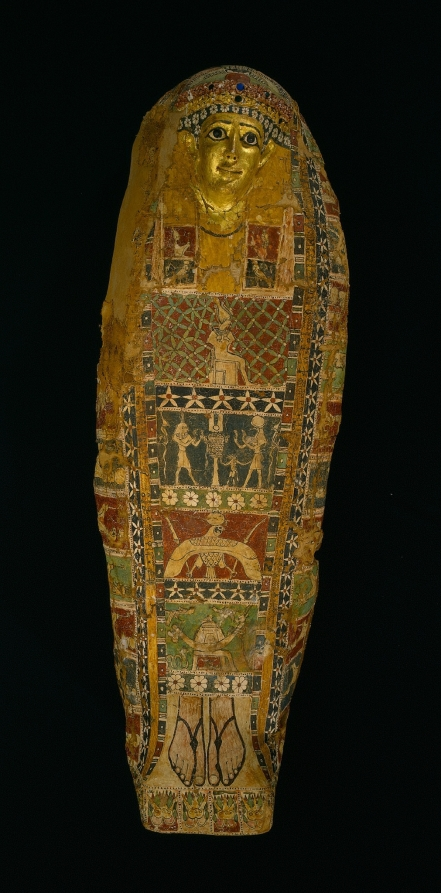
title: Cartonnage Mummy Case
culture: Egypt, Greco-Roman period (332 BCE–395 CE), Ptolemaic dynasty (305–30 BCE)–Roman empire (30 BCE–395 CE)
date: c. 50 BCE–50 CE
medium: cartonnage, painted and gilded, with glass inlays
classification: Funerary Equipment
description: This mummy case is made of cartonnage, a material similar to papier-mâché, but using layers of linen rather than paper. Cartonnage mummy cases such as these are contemporary with funerary portraits painted on wood or linen, although they present a very different appearance. The face, modeled in plaster, is bland and idealized, although the effect of the gilding and glass inlays is quite dazzling. The body is painted with traditional, age-old funerary motifs: the god Osiris, seated and mummiform; the fetish of Abydos, holy city of Osiris, flanked by standing deities (Thoth and Shu); a Horus falcon with outspread wings, and the bark of Sokar. Below these are the sandaled feet of the deceased. On the sides are rows of seated deities. On the top of the head are a winged scarab beetle flanked by Anubis jackals. On the foot are painted the soles of the deceased’s sandals, flanked by scorpions for protection.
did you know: This coffin is smaller and later in date than the other coffins in this gallery. It is made of cartonnage, which used layers of linen to create a material similar to papier-mâché. The painted portrait head displays the influence of Roman portraiture at this time and incorporates both gilding and glass inlays. Despite the fragile materials, this mummy case survived due to the very dry desert climate in which it was found.